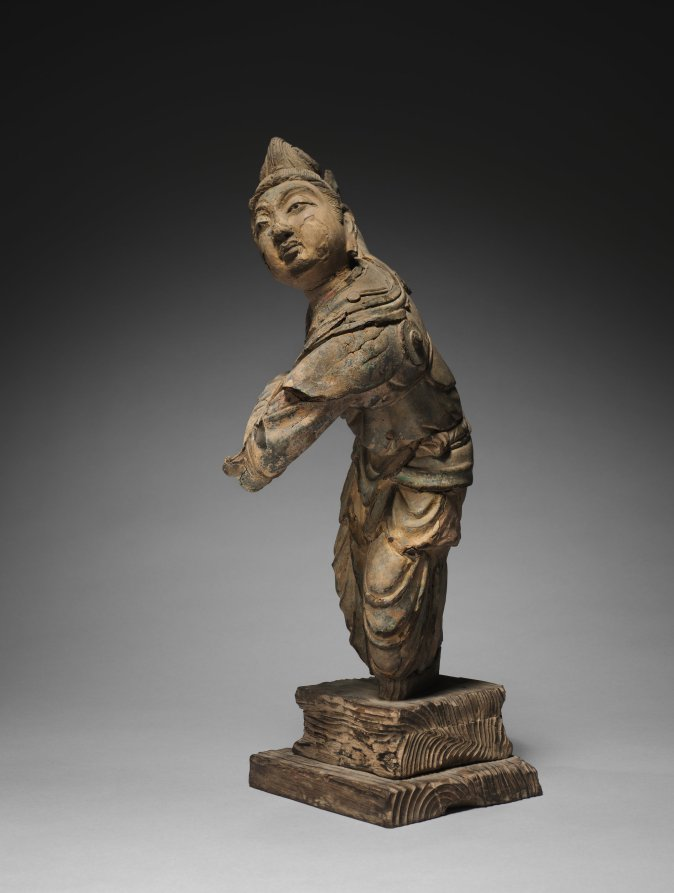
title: Dancing Apsaras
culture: China, late Tang dynasty (618–907) to Five dynasties (907–960)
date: 900s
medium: dry lacquer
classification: Sculpture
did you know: The sculpture was made from a rare technique involving alternate layers of cloth and lacquer, modeled on an armature or around a removable clay core.